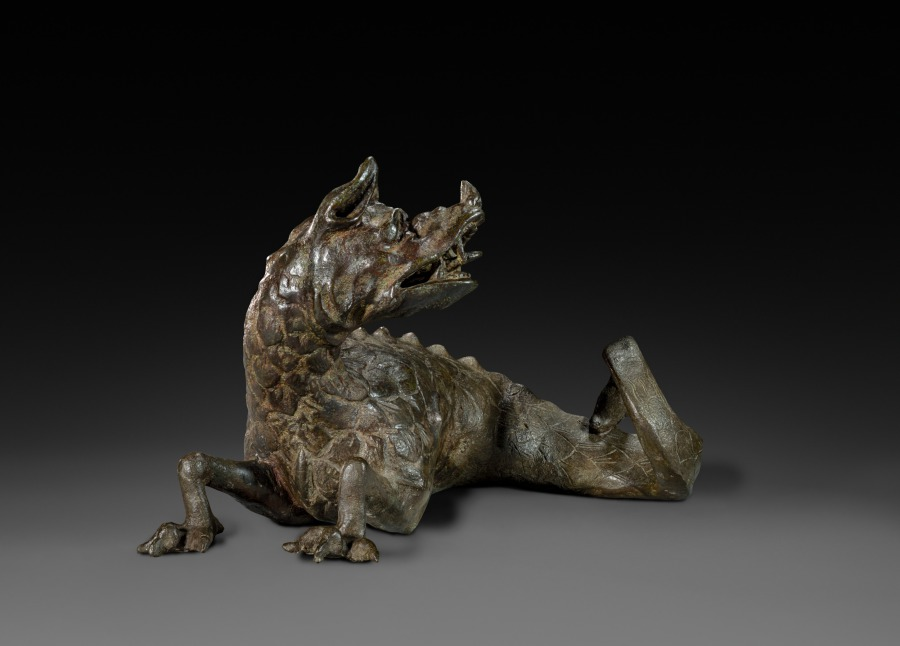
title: Dragon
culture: Italy, 18th century or later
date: 1700s or later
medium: bronze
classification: Sculpture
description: This figure was probably originally meant to serve as the decorative foundation to a larger object such as a casket or urn. In transition from decorative motif to independent work of art, the nether half may have been an addition, evidenced by the seam along its torso.